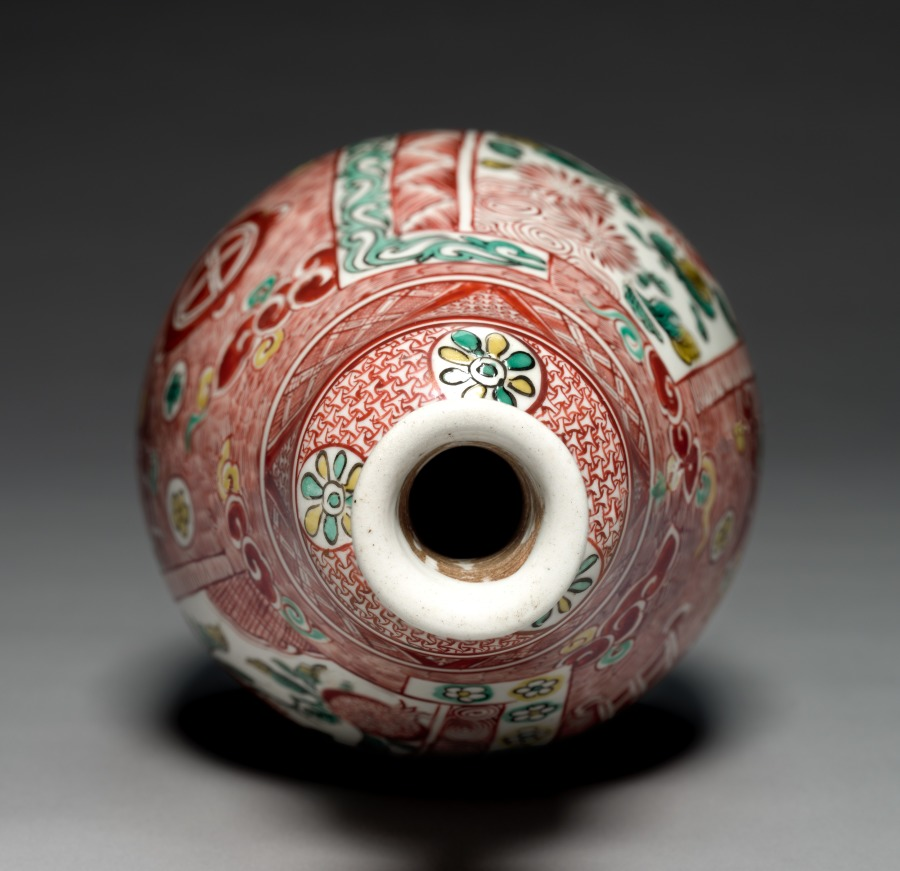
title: Tea Whisk-Shaped Sake Bottle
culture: Japan, Edo period (1615–1868)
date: 1660s–early 1670s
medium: Porcelain with overglaze enamel (Hizen ware, early iro-e)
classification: Ceramic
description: This sake bottle resembles a whisk used in preparing powdered green tea, with the handle at the top and the body of the brush flaring out below. Its bold design is anchored by images of chrysanthemums and pomegranates set in panels against a ground of red hatching with tricolored clouds. Additional patterns of swirls, stripes, flowers, and other forms make the piece dazzling.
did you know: This bottle is for sake, or fermented rice wine, Japan's most famous variety of local alcohol.